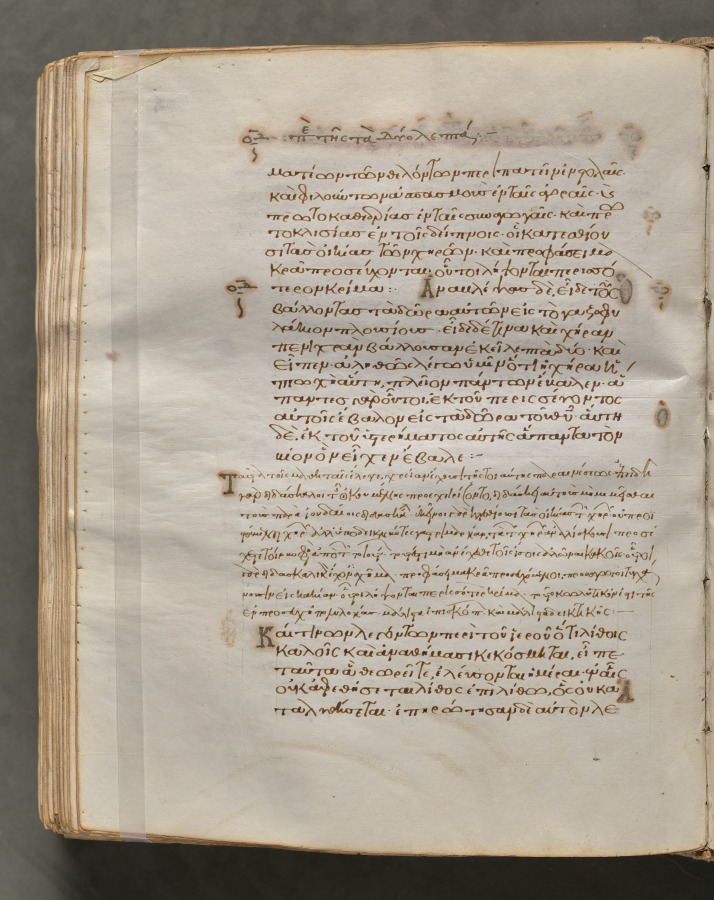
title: Text, folio 303 (verso), from a Gospel Book with Commentaries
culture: Byzantium, Constantinople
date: c. 1000–1100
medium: ink, tempera, and gold on vellum; leather binding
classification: Bound Volume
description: Each of the four gospels in this book opens on a page with brilliantly illuminated borders depicting the author of the text as well as birds—principally peacocks, symbols of the immortality of the soul—and fountains, representing the fountain of life and the salvation of the soul. This volume consists of 428 leaves with texts in Greek. Its level of sophistication suggests that it was probably written and decorated in a monastery in Constantinople.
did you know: Gospel books were carried in procession through Byzantine churches.